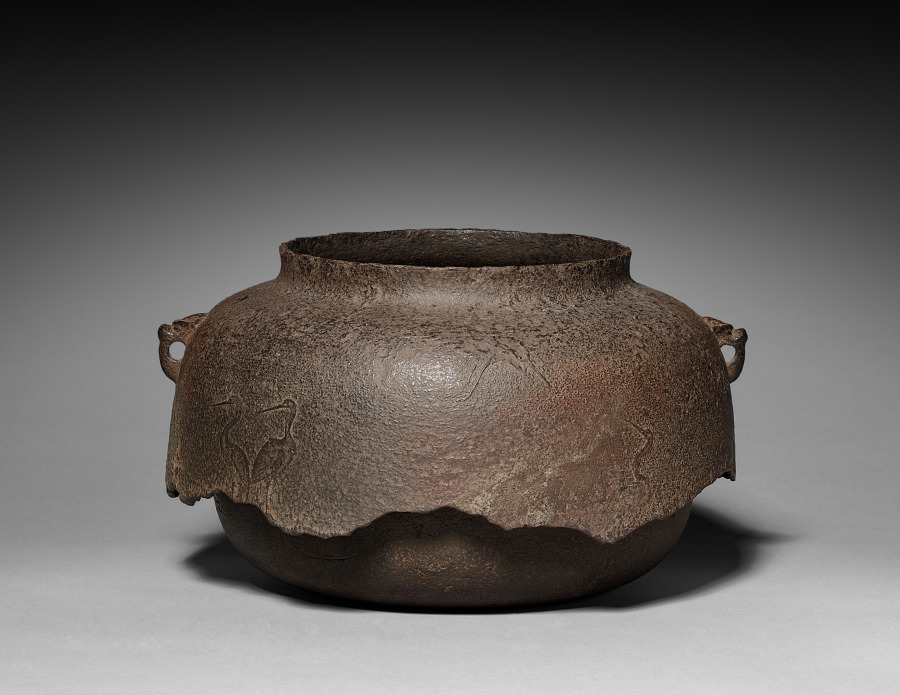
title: Kettle with Crane Design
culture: Japan, Muromachi period (1392–1573)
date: 1392–1573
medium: iron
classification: Metalwork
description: Water supplied from a jar such as the fine Shino-ware vessel (CMA 1972.9.a-b) was transferred to an iron kettle for boiling as part of the tea ceremony. Former CMA director Sherman Lee described the jagged, broken skirt of this kettle as "attractively damaged," complementing the unobtrusive wispy designs on its rough metal surface. The character of this kettle—worn, coarse, the "perfection" of symmetry destroyed—was cherished by tea masters for its powerful humility.